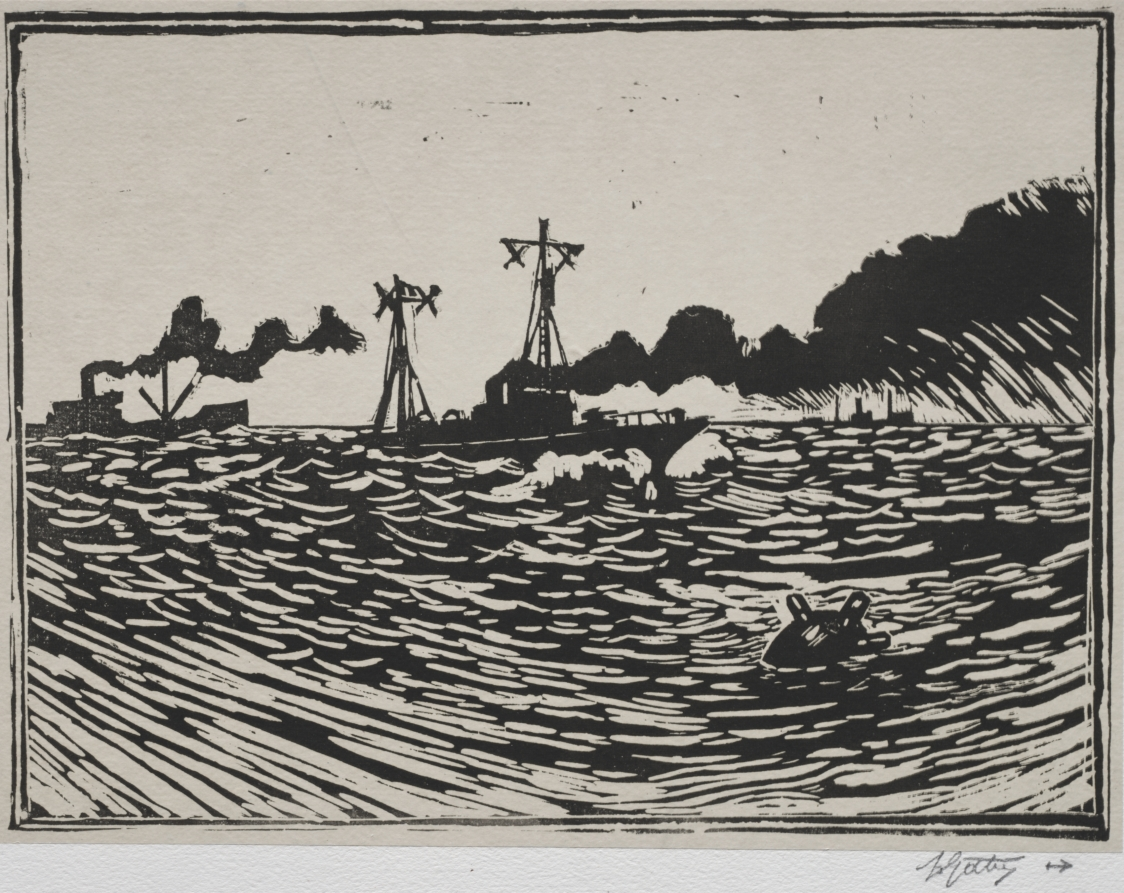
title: St. Nazaire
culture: France, 20th century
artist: Pierre Louis Gatier (French, 1878–1944)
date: c. 1900–1925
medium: linoleum cut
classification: Print